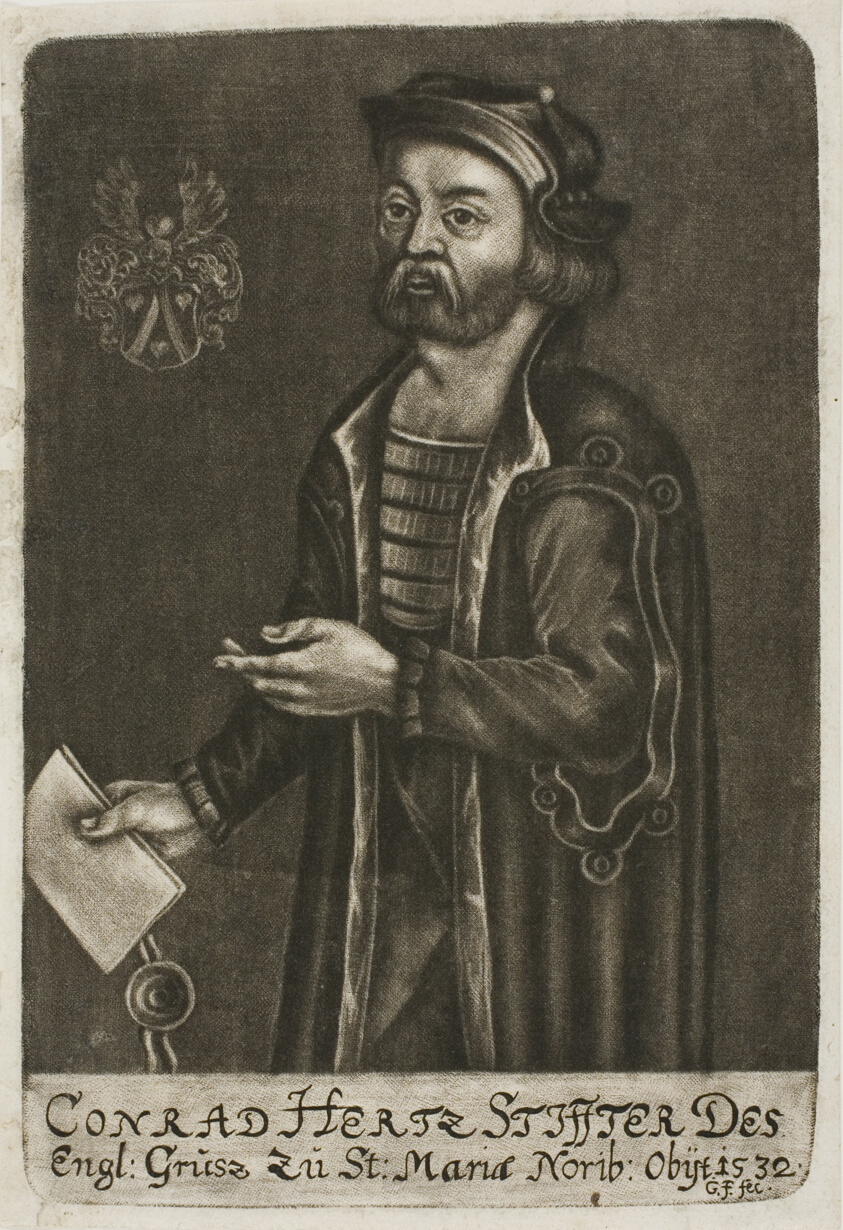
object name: Print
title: Conrad Hertz, Stiffter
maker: Georg Fennitzer (German, active 1697-1700)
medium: Mezzotint on ivory paper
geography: Germany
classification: mezzotint; print; prints and drawing